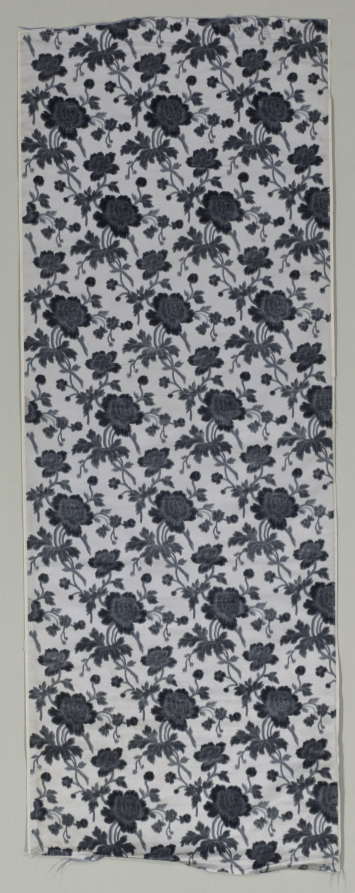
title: Velvet Fragment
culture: France, early 20th century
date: c. 1900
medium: velvet, ikat dyed; silk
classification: Velvet